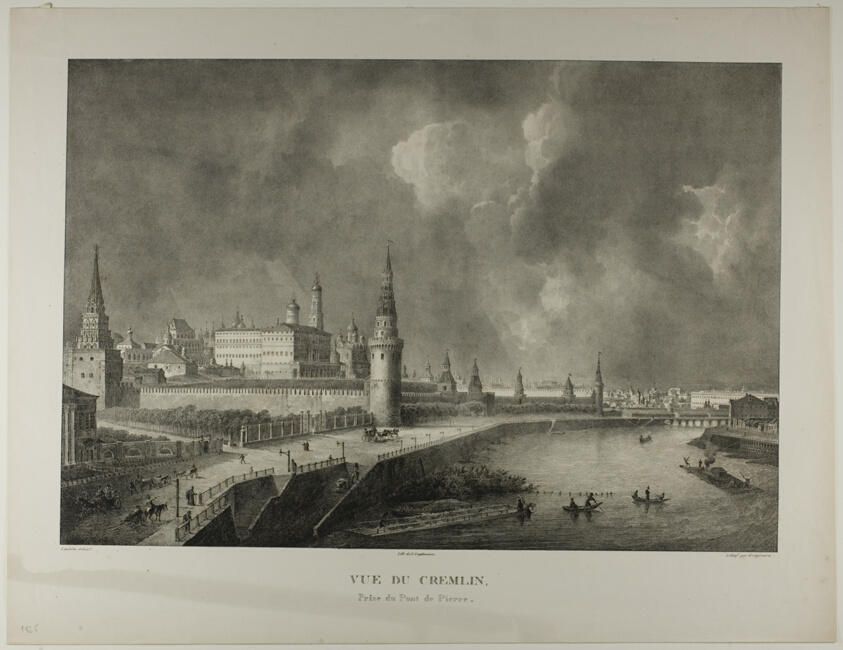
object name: Print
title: View of the Kremlin from the Stone Bridge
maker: Alexandre E. Fragonard (French, 1780-1850); after Jean-Baptiste Cadolle (French, 1782-1849); printed by Gottfried Engelmann (French, 1788-1839)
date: 1833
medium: Lithograph in black on ivory wove paper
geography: France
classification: lithograph; print; prints and drawing